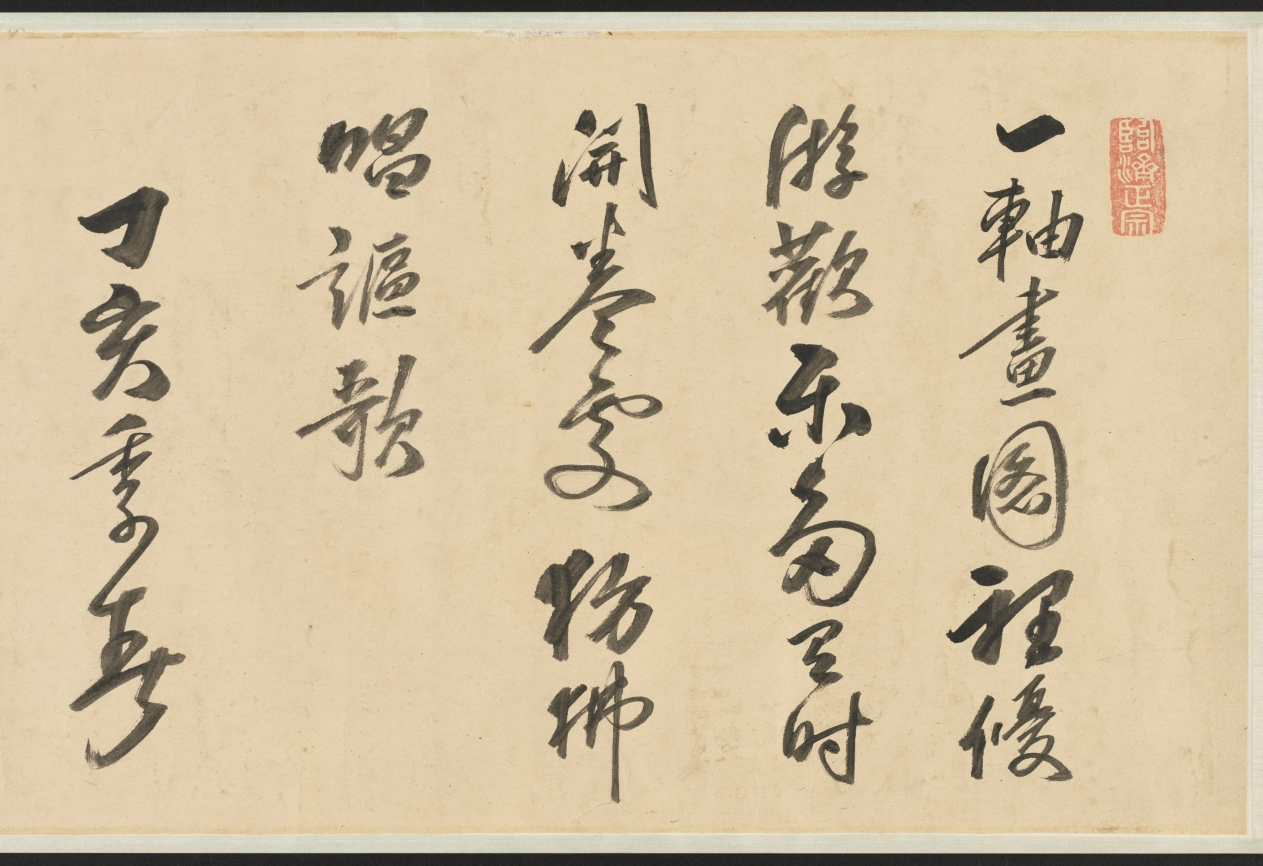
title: Purification at the Orchid Pavilion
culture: China, Qing dynasty (1644-1911)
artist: Fan Yi (Chinese, c. 1615–before 1688)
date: 1671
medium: Handscroll; ink and color on silk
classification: Painting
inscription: Artist's inscription, signature, and 2 seals: Painted by Fan Yi of Zhongfu during the second month of winter of the xinhai year [1671]. [2 seals] Fan Yi zhi yin, Zi yu yi.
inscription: Title on the frontispiece by Monk Yueshan (1629-1709).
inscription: 3 colophons and 13 additional seals: 1 colophon, dated 1707, and 6 seals of Yueshan; 2 colophons and 3 seals of Wong Kwan-Shut (Huang Junshi) 黃君實 (b. 1934); 2 seals of Fu Shen 傅 申 (b. 1937); 2 seals of Tessai Tomioka 富岡鐵齋 (1836-1924).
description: By the 1600s, the historic gathering at Lanting, Zhejiang province, in 353 CE was a common theme in Chinese painting. Originally based on a composition attributed to Li Gonglin (1049– 1106), now lost, Wu school artists revived the theme. Fan Yi, the brother of the artist Fan Qi from Nanjing, used delicate brushwork and luminous colors to depict the spring gathering.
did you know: The gathering’s host is in the Orchid Pavilion at the end of the scroll, representing an episode known as “Wang Xizhi Watching the Geese 王羲之觀鵝圖.”